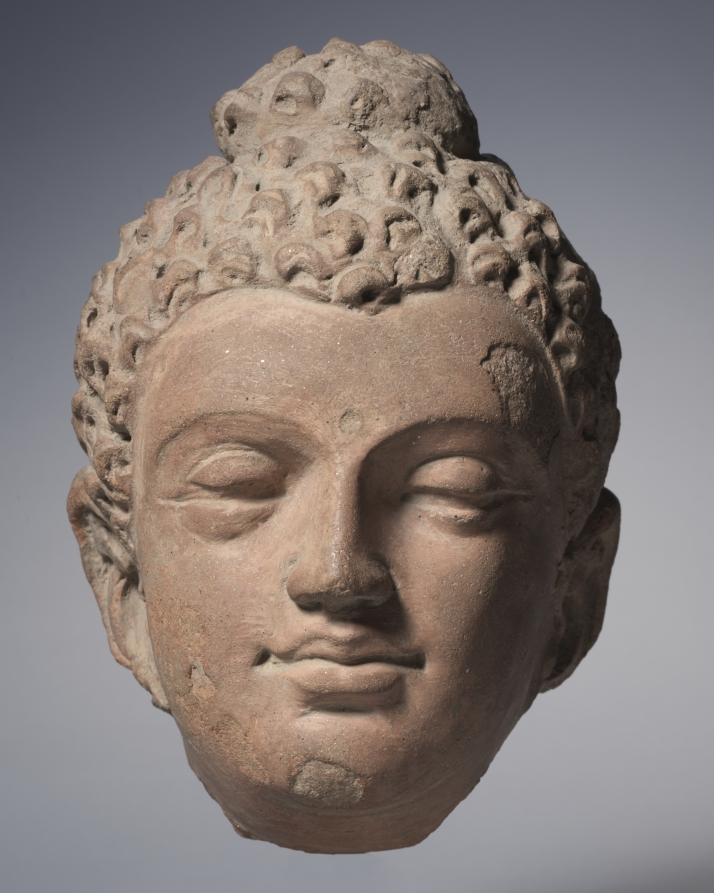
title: Head of Buddha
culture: India, Kashmir, Akhnur school, 8th century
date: 700s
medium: Clay, accidentally burned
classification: Sculpture